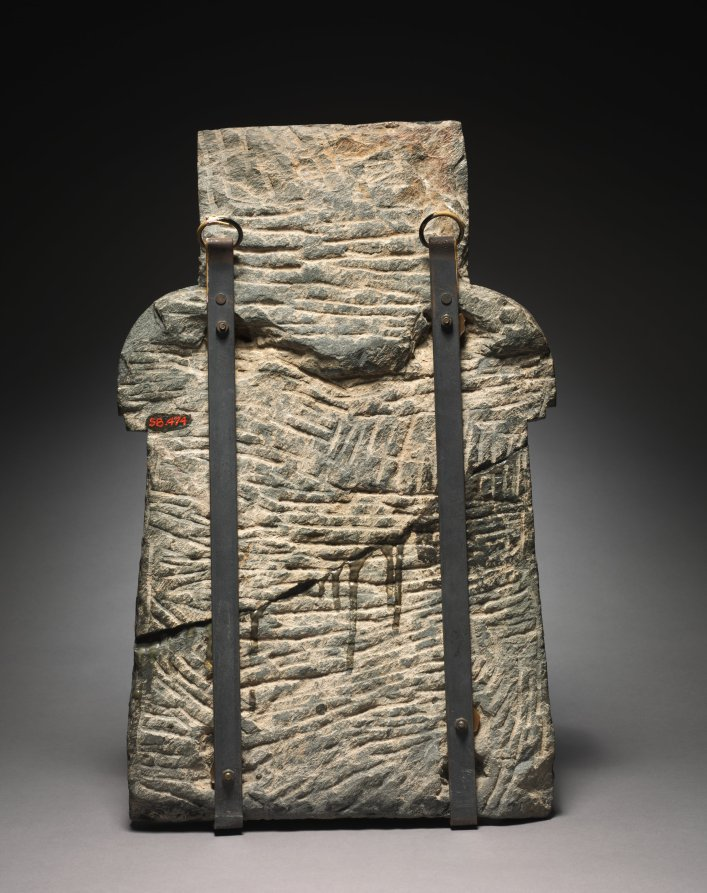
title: Scenes from the Life of Buddha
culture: Pakistan, Gandhara, Kushan period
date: 100s CE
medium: schist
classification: Sculpture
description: In this compact narrative relief, which was made to adorn a Buddhist stupa, scenes from the early life of the Buddha are depicted in order from top to bottom. His birth is at the top. The infant, now broken, is being received by Indra, King of the Gods, from the right side of his mother, who is depicted like a tree deity, grasping a branch with one hand. The baby Buddha miraculously took seven steps immediately after he was born, as indicated by the standing diminutive figure at the left of the scene. The next scene depicts the bodhisattva Maitreya, who will be the next Buddha to be born in the future, as an element of foreshadowing. Returning to the life of the historical Buddha, the sculptors then depict him as a prince, enjoying palace life with his wife. Eventually, he is compelled to leave his family to seek enlightenment and try to end the suffering in the world. In the lowest panel he rides off to the forest with a carved halo behind his head. In the border areas are meditating Buddha images, worshippers, guardians, and earth deities who drag a massive flower garland adorning the panel.